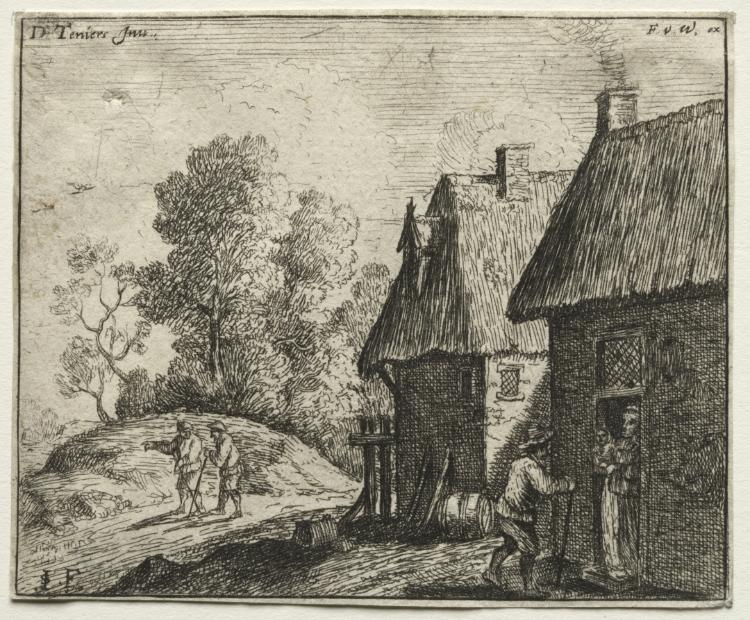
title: Peasant Talking to a Woman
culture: Flanders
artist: David Teniers (Flemish, 1610–1690)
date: 1614–79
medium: etching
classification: Print